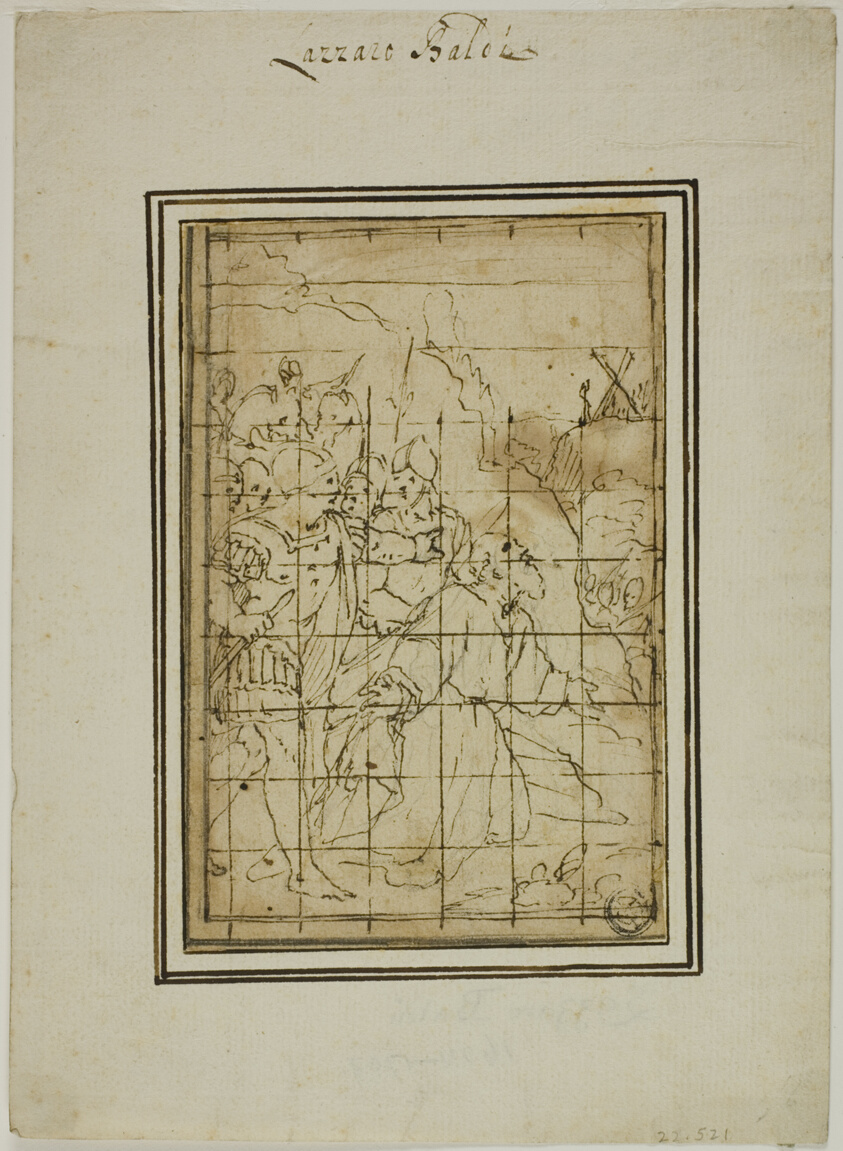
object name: Drawing and Watercolor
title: Saint Andrew Led to Martyrdom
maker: Attributed to Niccolò Circignani, called Il Pomarancio; Italian, 1517/24-after 1597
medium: Pen and brown ink over black chalk, on tan laid paper, squared in pen and brown ink, laid down on ivory laid paper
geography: Italy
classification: pen and ink drawings; drawings (visual works); prints and drawing